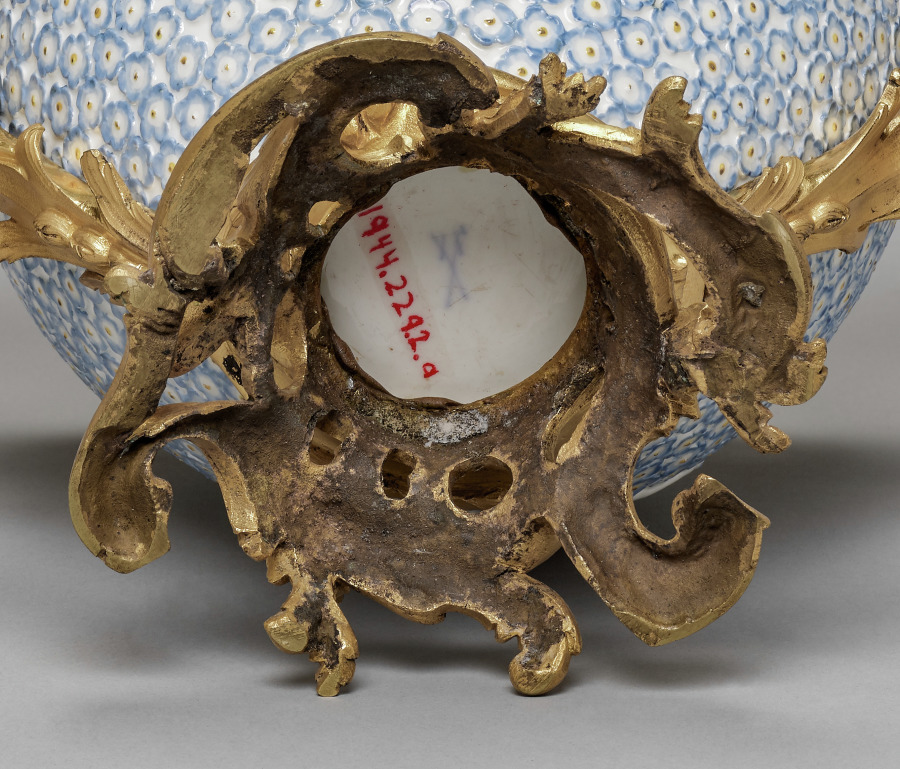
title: Vase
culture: Germany, Meissen, 18th century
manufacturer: Meissen Porcelain Factory (German, est. c. 1710)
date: 1749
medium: porcelain mounted in gilt bronze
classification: Ceramic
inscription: on obelisk located in one of the cartouche openings, the date 1749 appears.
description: One of these vases is dated 1749. They were perhaps part of a set of four covered vases that we know from documents were acquired by Mme. de Pompadour, mistress of Louis XV in 1752.